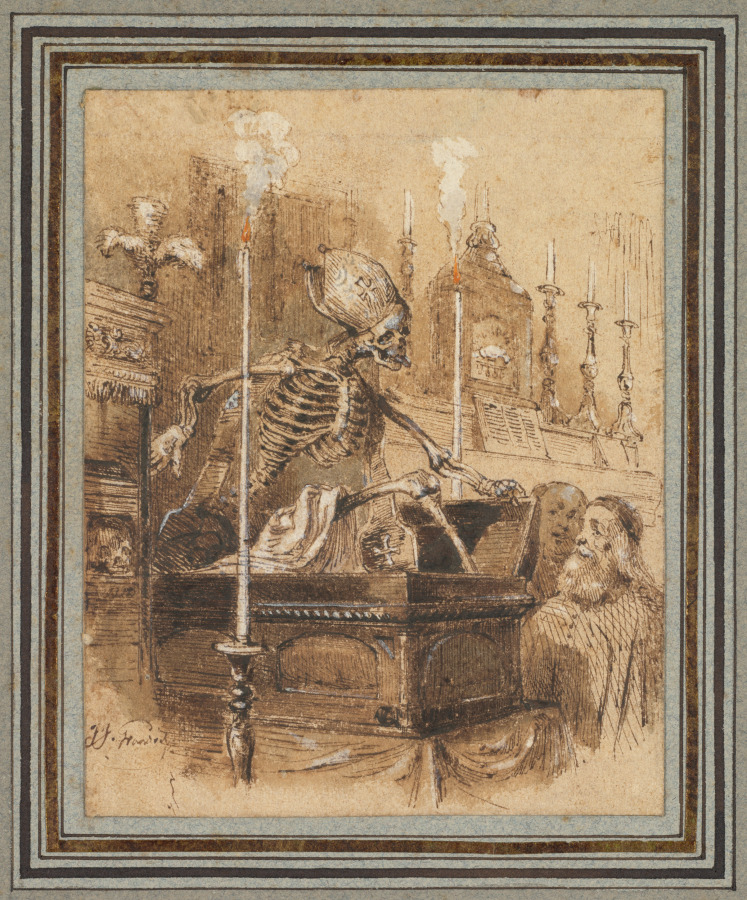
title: The Relics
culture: France, 19th century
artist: Jean-Jacques Grandville (French, 1803–1847)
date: c. 1835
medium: pen and brown ink, brown ink wash, heightened with white and red-orange gouache with scoring on wove paper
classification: Drawing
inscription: Verso, of original backing, at center, in black ink: “Les Reliques / Dessin original de / J.J. Grandville / (1803 – 1847)”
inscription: at left center, in pencil: “53”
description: Grandville was known for the many illustrations he contributed to books and periodicals, often in a creative, fantastic style. This drawing relates to an image that appeared in an 1835 edition of the popular songwriter Pierre Jean de Béranger’s complete works. It accompanied the lyrics to a macabre song entitled Les Reliques, written in the voice of the skeleton who appears in the image.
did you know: This drawing illustrated Les Reliques, a song written in the voice of the skeleton seen in the image.